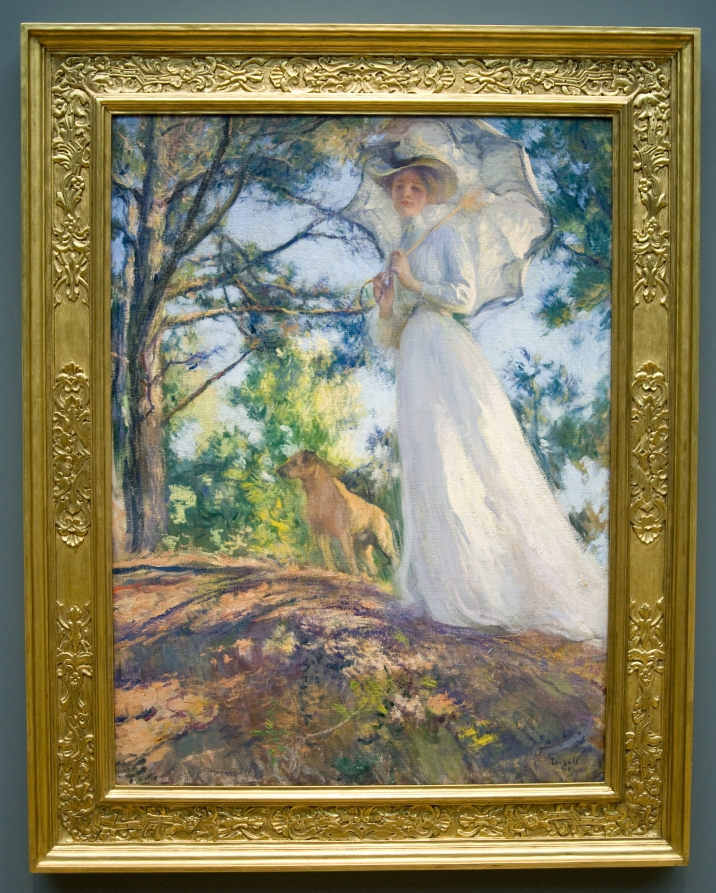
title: On Bos'n's Hill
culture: America, early 20th Century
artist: Edmund C. Tarbell (American, 1862–1938)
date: 1901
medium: oil on canvas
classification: Painting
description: Located in New Castle, New Hampshire, Bos’n’s Hill was a favored leisure spot for Tarbell’s family, which included four children. It provides the luminous setting for this depiction of the artist’s wife, Emeline, who strolls through the landscape with a parasol to protect her from the sun, while a beloved pet dog accompanies her. Four years later, the couple purchased a summer house nearby.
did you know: The artist was a popular art professor in Boston, and his followers were nicknamed "Tarbellites."